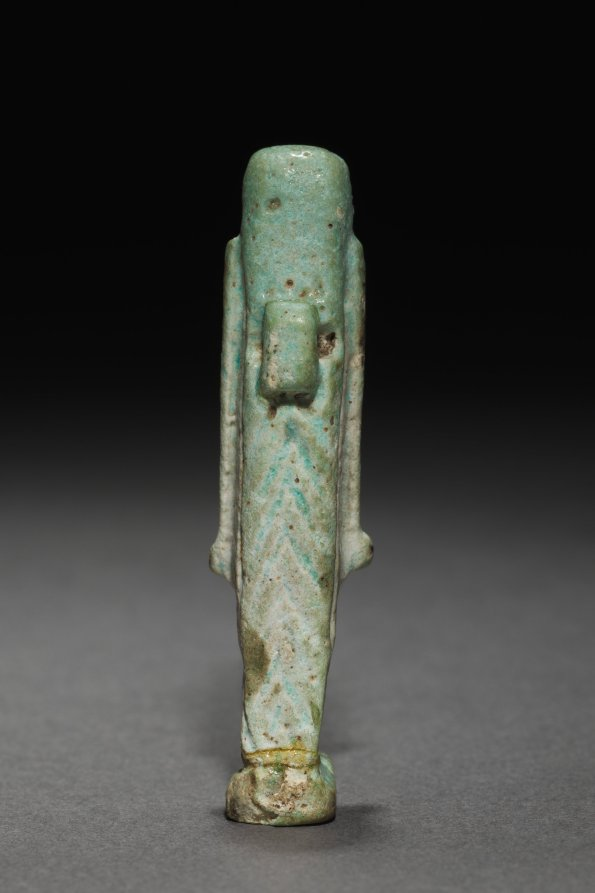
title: Amulet of Taweret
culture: Egypt, Greco-Roman period (332 BCE–395 CE), Ptolemaic dynasty (305–30 BCE)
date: 305–30 BCE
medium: light robin's egg blue faience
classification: Amulets